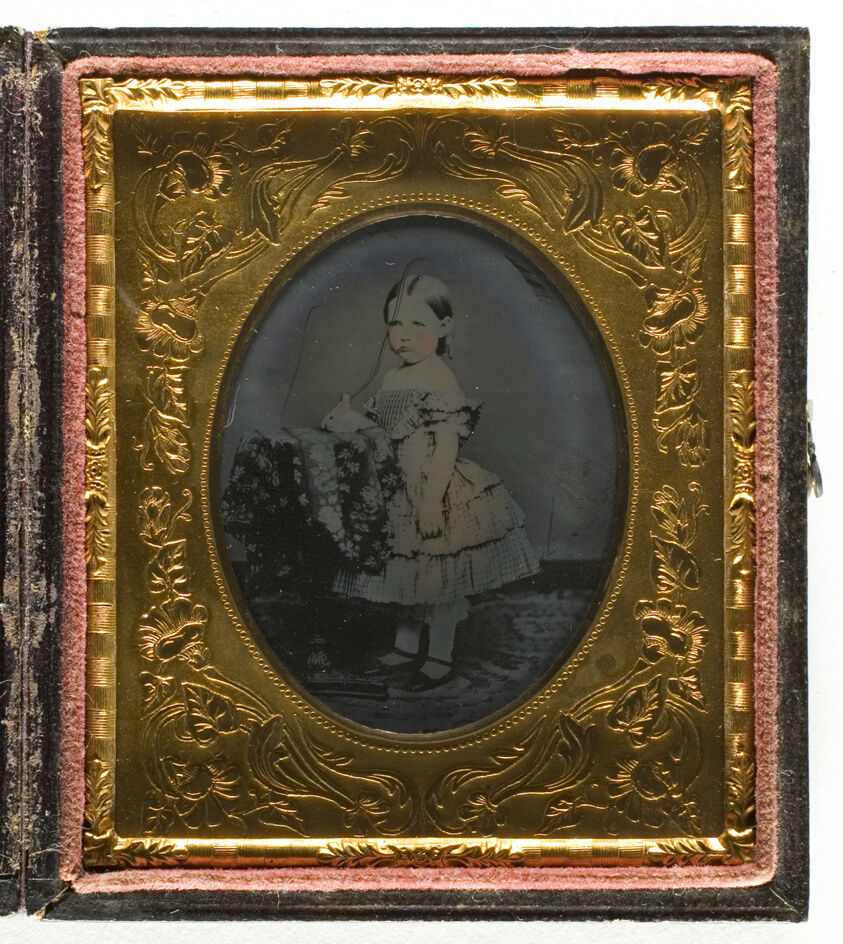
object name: Photograph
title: Untitled (Portrait of Standing Girl)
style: 19th century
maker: Artist unknown; 19th century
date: 1853/1899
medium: Tintype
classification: photography; photograph